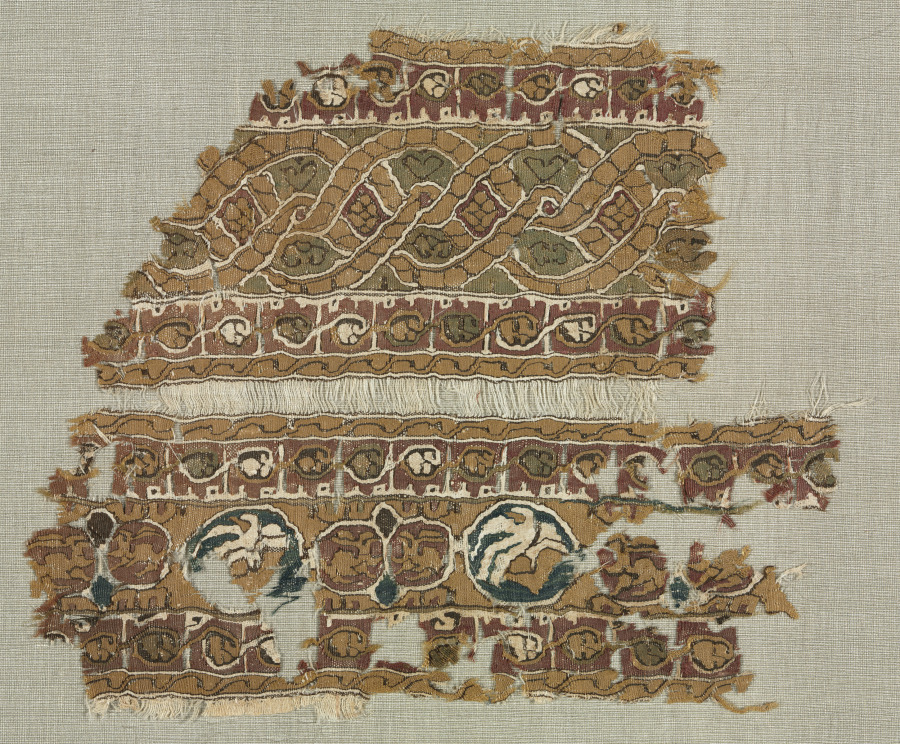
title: Fragment of a Tiraz-Style Textile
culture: Egypt, Fatimid period, probably Caliphate of al-Musta'li, AH 487-495 (A.D. 1094-1101)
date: 1094 – 1101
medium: tabby ground with inwoven tapestry ornament; linen and silk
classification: Textile